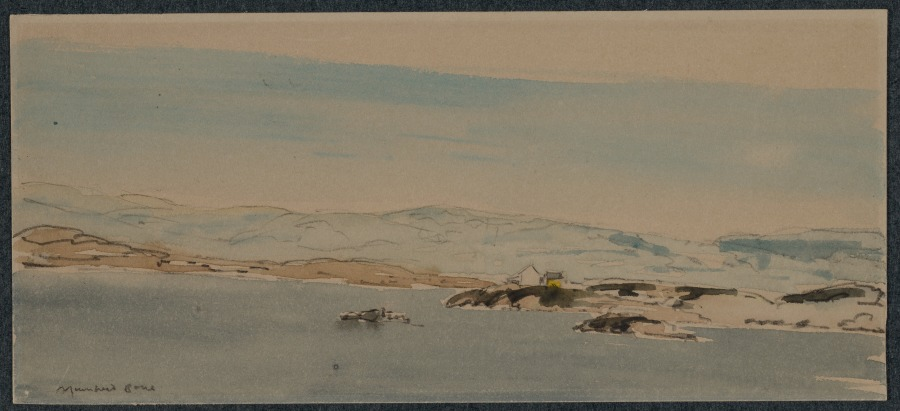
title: Entering Bergen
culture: England, 20th century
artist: Muirhead Bone (British, 1876–1953)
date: c. 1896–1953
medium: watercolor and graphite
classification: Drawing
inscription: Lower right, in graphite: Muirhead Bone